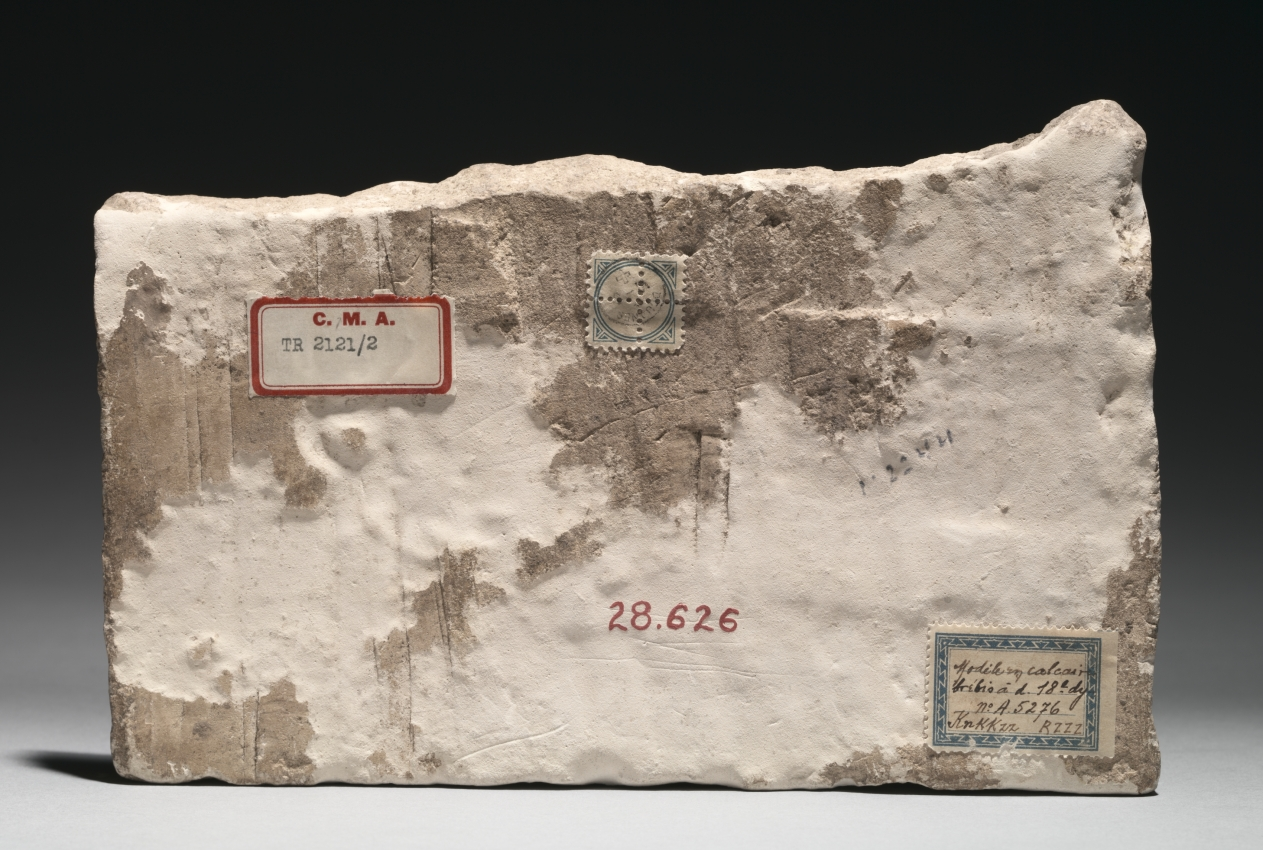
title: Votive Relief of a Ram Deity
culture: Egypt, Greco-Roman period (332 BCE–395 CE), Ptolemaic dynasty (305–30 BCE)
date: 305–30 BCE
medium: limestone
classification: Sculpture